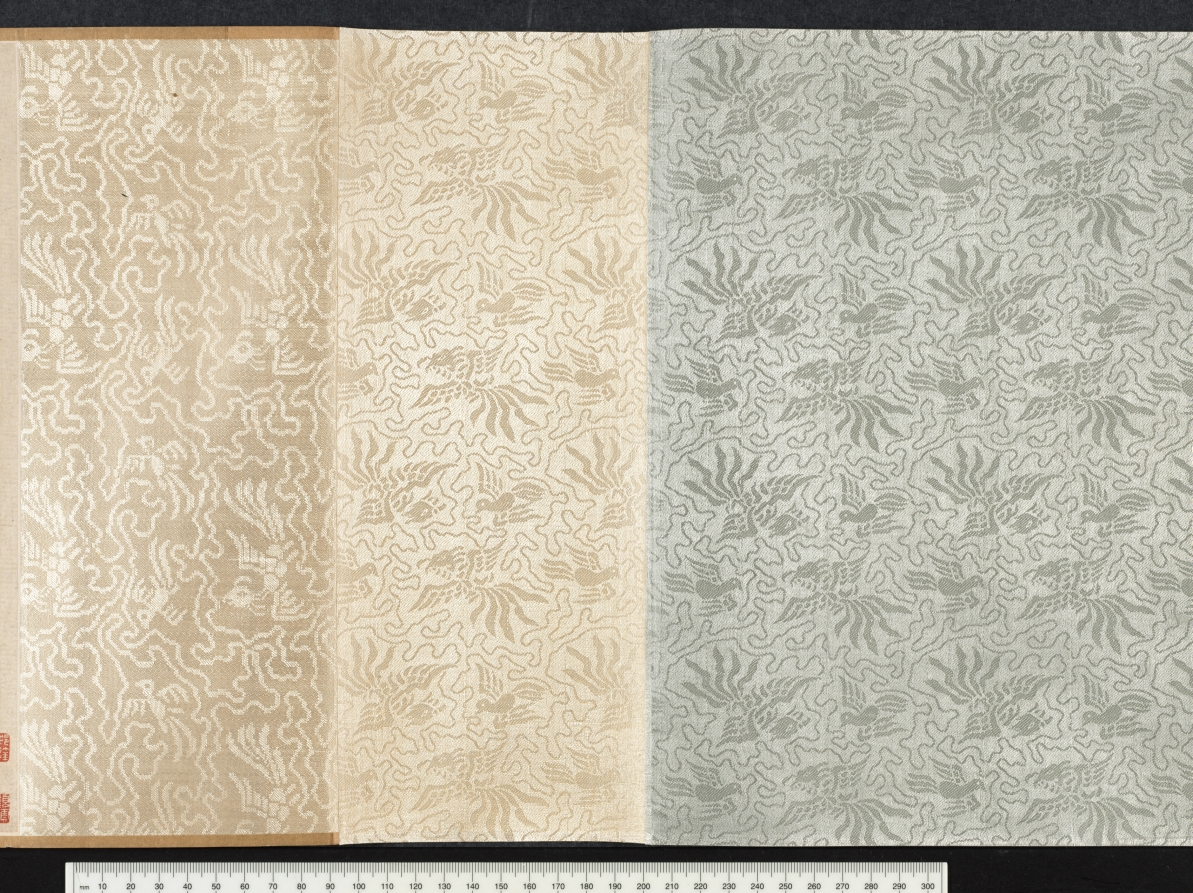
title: Chrysanthemums and Cabbage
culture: China, Ming dynasty (1368–1644)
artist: Tao Cheng (Chinese, active c. 1471–after 1502)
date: c. 1486 or before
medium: handscroll, ink and slight color on paper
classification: Painting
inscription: Artist's seal at beginning of painting: Yun hu 雲湖. Title by Wang Wenzhi 王文治 (1730–1802), date 1756. 2 seals of Wang Wenzhi 王文治 (1730-1802); 3 seals of Ku Yün (n. d.)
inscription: Section A (Chrysanthemums): 1 poem and 1 seal of Zhang Yuanzhen 張元禎 (1437–1507) - Jinshi, 1461; 1 poems and 3 seals of Ni Yue 倪岳 (1444–1501) - Jinshi, 1464; 1 poems and 2 seals of Zhao Xiang 趙祥 (life dates unknown) - Jinshi, 1469; 1 poems and 1 seals of Wu Xixian 吳希賢 (1437–1489) - Jinshi, 1464; 1 poems and 1 seals of Lü Chang 呂㦂 (1449–1511) - Juren, 1471; 1 poems and 3 seals of Fu Han 傅瀚 (1435–1502) - Jinshi, 1464; 1 poems and 1 seals of Feng Jue 馮珏 (life dates unknown) - Jinshi, 1478.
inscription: Chrysanthemums section, poem 1, by Zhang Yuanzhen 張元禎 (1437–1507): Several bushes of chrysanthemums grow in front of the Five-Willow Cottage,/ The yellow ones are really yellow and the white ones white./ This affable and decent fellow, young in years and unsophisticated,/ Has snapped one of the branches to dip in ink. (The Five-Willows Cottage was the home of the poet Tao Qian 陶潛 (Tao Yuanming 陶淵明, AD 365-427).) Chrysanthemums section, poem 2, by Ni Yue 倪岳 (1444–1501): Where at the Eastern Fence can you grieve for the Soul of the Xiang River?/ A man of upright character is mourned within the traces of ink./ White jade with a slight flaw would be a grievance forever,/ Later men should understand why even the roots of the flowers are washed. (Eastern Fence refers again to the poet Tao Qian 陶潛, while the Soul of the Hsiang River refers to the poet Qu Yuan 屈原 (c. 340–278 BC).) Chrysanthemums section, poem 3, by Zhao Xiang 趙祥 (life dates unknown): A clump of chrysanthemum grows in front of the bamboo pavilion,/ The winds of many autumns have blown since we parted beyond the river./ Straining wine through the official's cap of Tao [Qian] to prolong autumn's pleasures,/ The mists and clouds of ten thousand miles belong to the intoxicated. Chrysanthemums section, poem 4, by Wu Xixian 吳希賢 (1437–1489): It is a different spring if mulberry is planted during the latter part of the year,/ The dust of the world originally did not drop on clothing./ Who spills out ink under the Eastern Fence/ And paints so freely this portrait of chrysanthemums for the venerable Sir Tao? Chrysanthemums section, poem 5, by Lü Chang 呂㦂 (1449–1511): This full tray of ink for painting [flowers] at the Eastern Fence;/ Their whiteness or yellowness is not essential in capturing their beauty./ I don't have to go to Jiangnan to see them myself./ At my old house grow two or three branches. Chrysanthemums section, poem 6, by Fu Han 傅瀚 (1435–1502): Who daubed autumn flowers with ink/ As if they were dark dew on a branch tip only vaguely seen at evening?/ After the lazy clouds disperse, no one paints;/ A certain unconventionality pervades this painting. Chrysanthemums section, poem 7, by Feng Jue 馮珏 (life dates unknown): To satisfy his hunger, [the chrysanthemums] have at times entered the poetry of Qu Yuan;/ Taking up the wine cup, it felt close to Tao Qian./ [With them I am like] a lonely root sustained by deep water/ Or an old man to whose hair the color of youth returns.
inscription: Section B (Cabbage): 1 poem and 1 seal of Cai Qi 蔡圻 (life dates unknown) - degree information not known; 1 poems and 3 seals of Ni Yue 倪岳 (1444–1501) - Jinshi, 1464; 1 poem and 3 seals of Jiao Fang 焦芳 (1436–1517) - Jinshi, 1464; 1 poem and 3 seals of Li Dongyang 李東陽 (1447–1516) - Jinshi, 1464; 1 poems and 1 seals of Wu Xixian, signed “Xixian” 吳希賢 - Jinshi, 1464; 1 poems and 3 seals of Fu Han 傅瀚 (1435–1502) - Jinshi, 1464; 1 poems and 1 seals of Lü Chang 呂㦂 (1449–1511) - Juren, 1471; 1 poems and 2 seals of Zhao Xiang 趙祥 (life dates unknown) - Jinshi, 1469; 1 poems and 1 seals of Feng Jue 馮珏 (life dates unknown) - Jinshi, 1478.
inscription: Cabbage section, poem 1, by Cai Qi 蔡圻 (life dates unknown): The ink splashes are fresh from a frosty brush dipped in pond water;/ I can visualize that time when Yunhu 雲湖 [Tao Cheng] first showed his talents./ I lament the places where I scribbled before,/ Who would open them to inscribe a poem? (The first line is an allusion to the famous Jin dynasty calligrapher Wang Xizhi 王羲之 (AD 303-361), who practiced calligraphy so diligently at the edge of a pond that the water turned black with ink.) Cabbage section, poem 2, by Ni Yue 倪岳 (1444–1501): After rain the vegetables begin to grow;/ How are the colors of the masses lately!/ Once you get used to them, the tastiest parts are the ends of the roots;/ I don't know if they can be used for "seasoning soup." ("Seasoning soup" is an allusion to the statesmanship of a chief minister.) Cabbage section, poem 3, by Jiao Fang 焦芳 (1436–1517): This crop of purple stalks and green leaves is late and irregular;/ Now the rainy season is over for the Eastern Garden./ All the nobles nowadays dine on meat;/ Who of them knows the flavor of this [cabbage]. Cabbage section, poem 4, by Li Dongyang 李東陽 (1447–1516): It's always helped the honest man to sober up after drinks./ I intend to go to the deepest part of the stream-crossed garden/ To refresh myself in the fragrance and dew of evening. Cabbage section, poem 5, by Wu Xixian 吳希賢 (1437–1489): After rain, the white silk is filled with fragrant vegetables;/ How many times this happens in Mr. Tao's paintings./ On whom will you depend to present a memorial to the ruler?/ Don't let this color emerge on the faces of the people. (The last line is meant as a warning to officials: the color of the vegetables (green) may be pleasing in itself, but when it emerges on the faces of the starving poor, it signifies a badly governed world.) Cabbage section, poem 6, by Fu Han 傅瀚 (1435–1502): For twenty years I have feasted on the excellent mutton of an official;/ Yet I talk and dream about the garden and its vegetables./ Do not merely say it is good to chew the root of the cabbage--/ You must taste to understand what poverty is. Cabbage section, poem 7, by Lu Chang 呂㦂 (1449–1511): The capital is never a place for an apprentice in the "garden of scholarship."/ Who would write about gardens and vegetables on an examination paper?/ I've walked throughout the country in spring;/ Make sure the people don't show this color. Cabbage section, poem 8, by Zhao Xiang 趙祥 (life dates unknown): After a wash of rain, the spring garden is still in order;/ The flavor [of the cabbage] is more suitable with a small drink and the hum of a tune./ The rich and powerful in their mansions consume dish after dish of meat;/ Vegetarian food is known only by the scholars. Cabbage section, poem 9, by Feng Jue 馮珏 (life dates unknown): A new cabbage is nourished with dew;/ It takes a long time to grow and mature./ The business of "seasoning the soup" is your responsibility;/ Better command the gardener to take care [of the cabbages]. trans. HK/LYSL/WKH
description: On an autumn day in Beijing, Tao Cheng had a gathering with a group of scholar-officials and created two paintings in a spontaneous, casual style. The first depicts chrysanthemums, slender bamboo stalks, and a rock in monochrome ink. Tao applied light colors for the second painting that depicts cabbage. Tao deliberately placed the images on the first sections of the paper so that his honorable guests could add their poetic inscriptions inspired by his imagery. In the first section to the right, all seven poetic inscriptions refer to the beloved poet and recluse Tao Qian (also called Tao Yuanming, AD 365–427) who was particularly known for his profound love for chrysanthemum flowers. Most of the inscriptions in the second section express sympathy for the poor, since cabbage is the main ingredient in their humble food. Taken together, the poems and paintings allude to the life and responsibilities of the scholar-official: the importance of both an upright character and a concern for the poor citizens in order to achieve good government.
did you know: Eminent calligrapher Wang Wenzhi 王文治 was only 27 sui when he wrote the title in 1756.